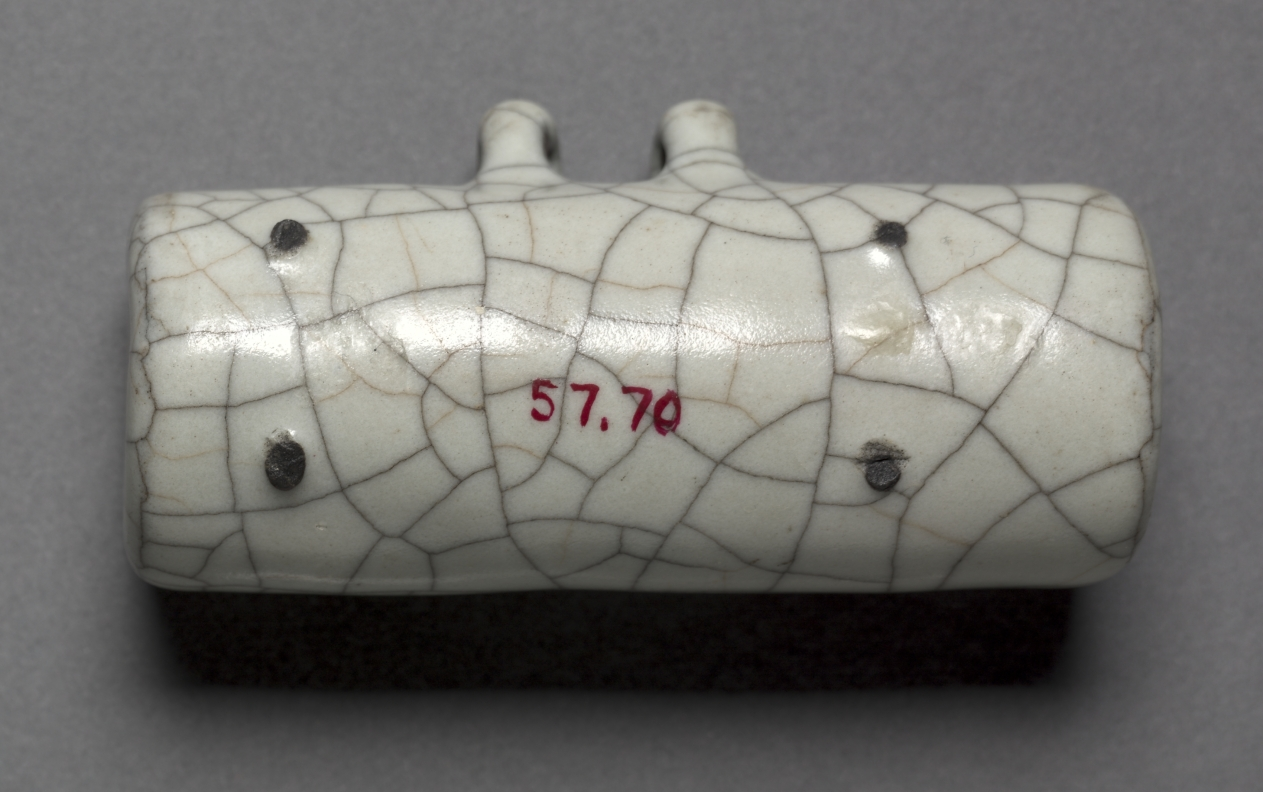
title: Bird feeder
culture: China, Song dynasty (960-1279)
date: 960–1279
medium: Glazed reddish-brown stoneware, Guan ware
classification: Ceramic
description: Walking small birds in bamboo cages furnished with precious porcelain feeders is a traditional leisure time pursuit of elderly men in China.